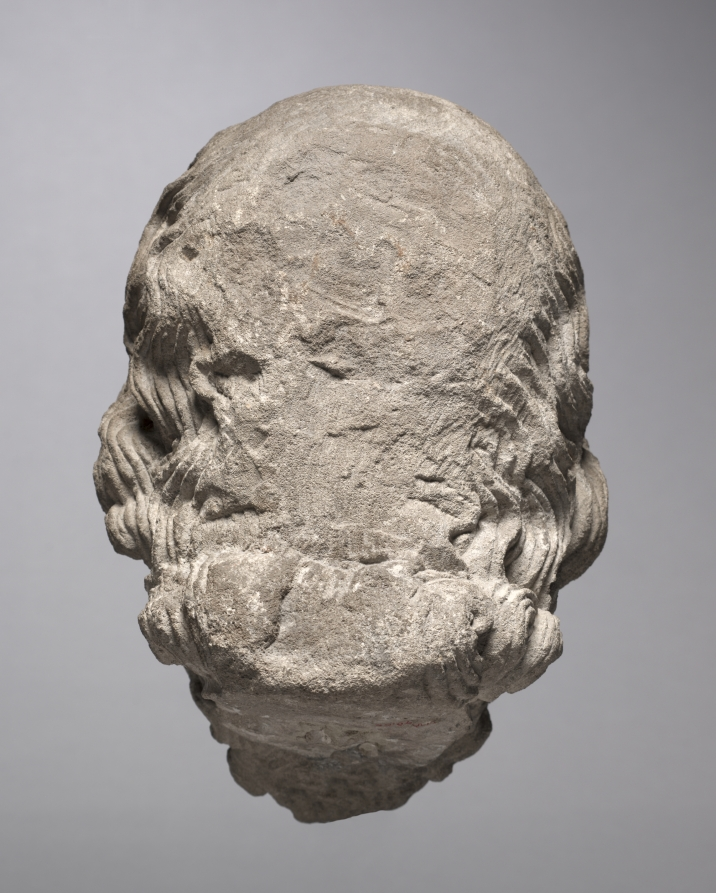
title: Head of an Apostle from the South Portal of the Cathedral of Thérouanne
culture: Northern France (Pas-de-Calais), Thérouanne, 13th century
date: c. 1235–1240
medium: oolitic limestone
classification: Sculpture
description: These monumental stone heads are among the substantial known remains of the sculptural program of Thérouanne’s cathedral, which was razed by Emperor Charles V of Spain in June 1553. These heads were found in a wall of rue Ste. Croix in the town of Saint Omer (a short distance to the north) in January 1923. This group of sculptures from the gable of the south portal of Thérouanne, which includes a stylistically related Christ as Judge, is recorded to have been moved to the Cathedral of Saint Omer in 1554. With their deeply carved wavy hair, curly beards, wrinkled foreheads, and ponderous facial features, these imposing heads—even in their now fragmentary and weathered state—attest to the powerful monumentality of the stone sculpture covering French church facades of the Gothic period.